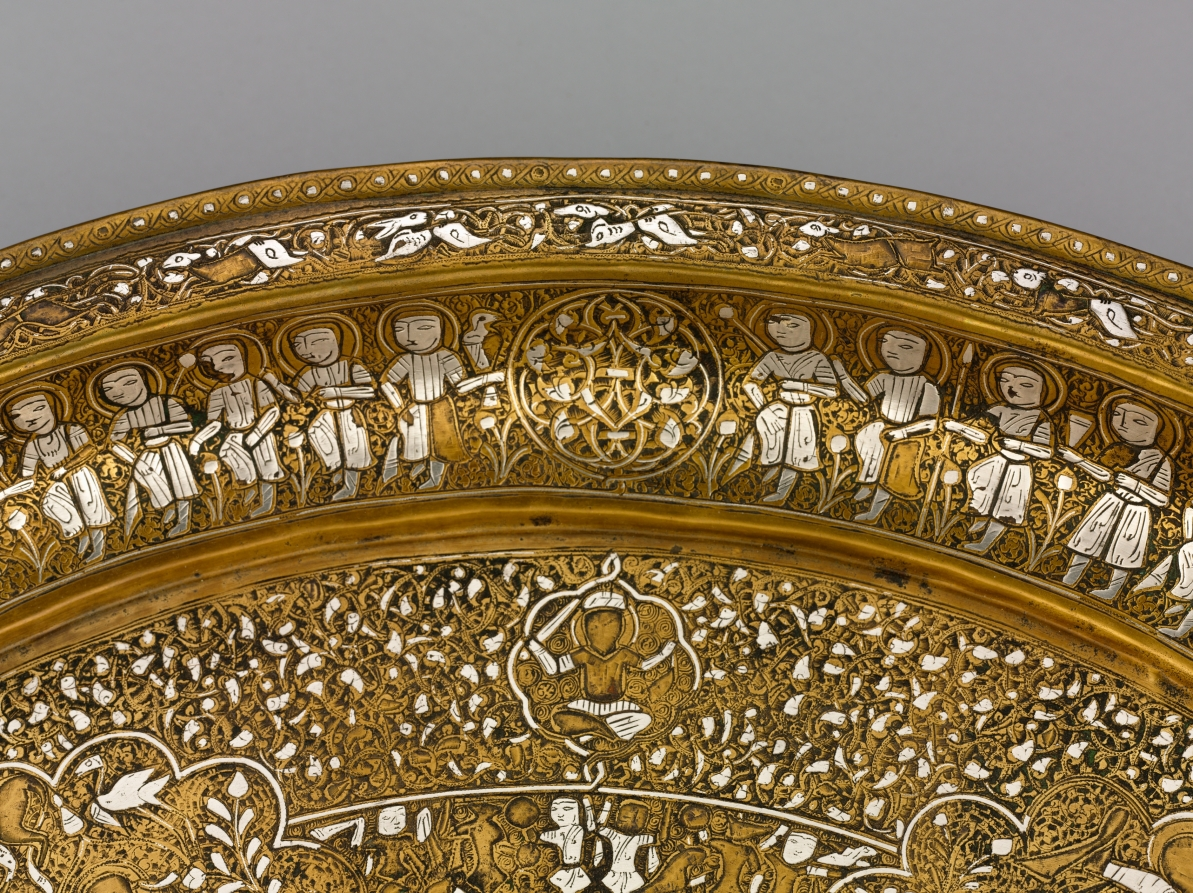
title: Tray Portraying Courtly Pleasures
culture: Syria, Ayyubid period (1171–1260)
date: 1240s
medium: sheet brass inlaid with silver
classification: Metalwork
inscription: The presence of ligatures in the narrow circular bands with interconnected human and animal figures suggests this may be a degenerate form of animated script. It is indecipherable.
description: This tray features images of courtly life interspersed with astronomical symbols. The scenes contained within large multilobed medallions display an enthroned prince with lions at his feet, a banquet, a hunt, dancers, and musicians. Contained within the concentric circles there are also references to solar and lunar motifs, including figures holding sunbursts and lunar crescents. This tray is made of a single sheet of brass and the silver inlay, which is best preserved on the tray’s inner curve, suggests its original brilliance.